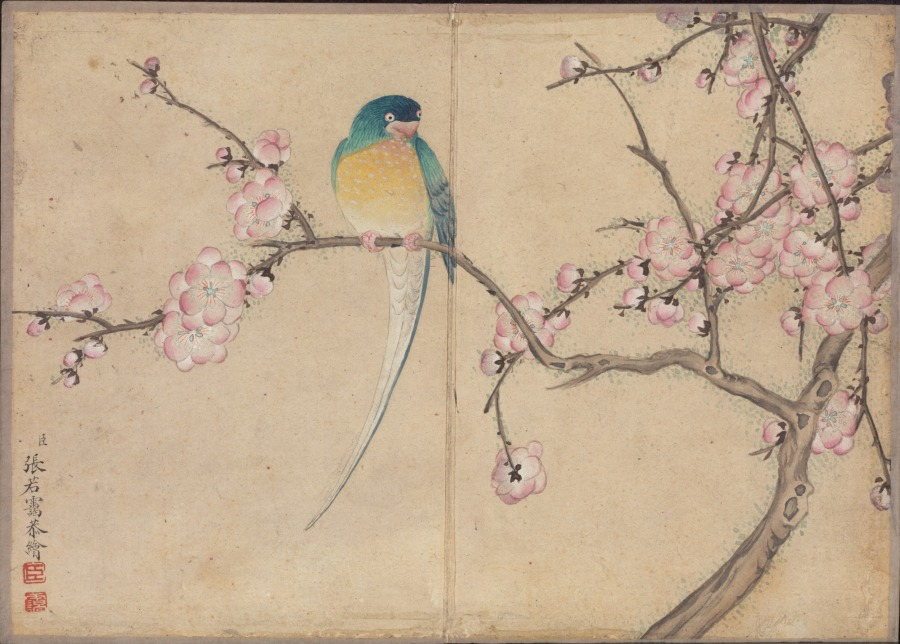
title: Desk Album: Flower and Bird Paintings (Bird with Plum Blossoms)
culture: China, Qing dynasty (1644-1911)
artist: Zhang Ruoai (Chinese, 1713–1746)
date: 1700s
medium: album leaf, ink and color on paper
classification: Painting